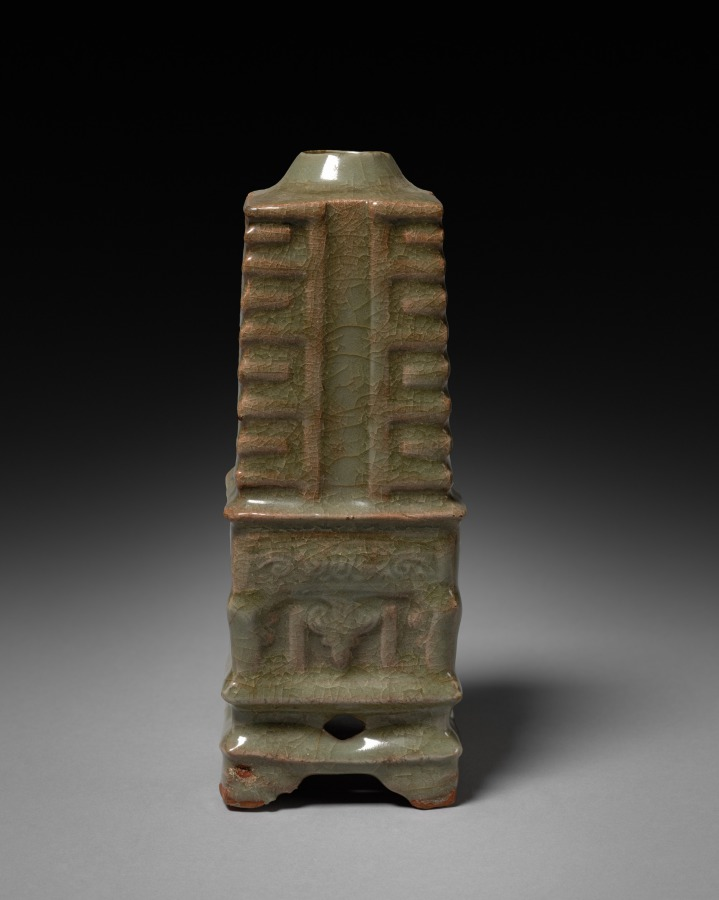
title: Vase in Shape of Cong: Southern Celadon Ware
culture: China, Zhejiang province, Yuan dynasty (1271-1368)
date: 1271–1368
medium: glazed buff stoneware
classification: Ceramic